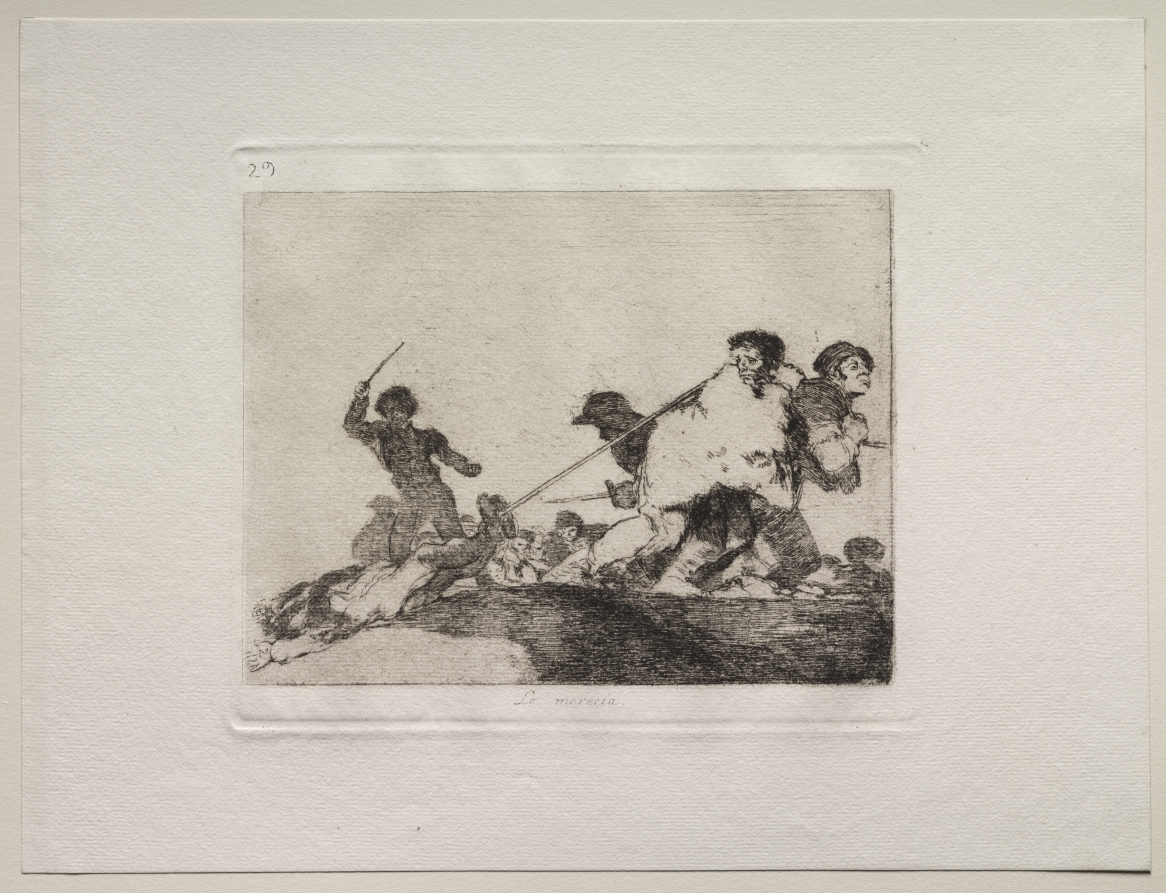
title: The Horrors of War: He Deserved It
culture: Spain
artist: Francisco de Goya (Spanish, 1746–1828)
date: 1810–20, published 1863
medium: etching and aquatint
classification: Print